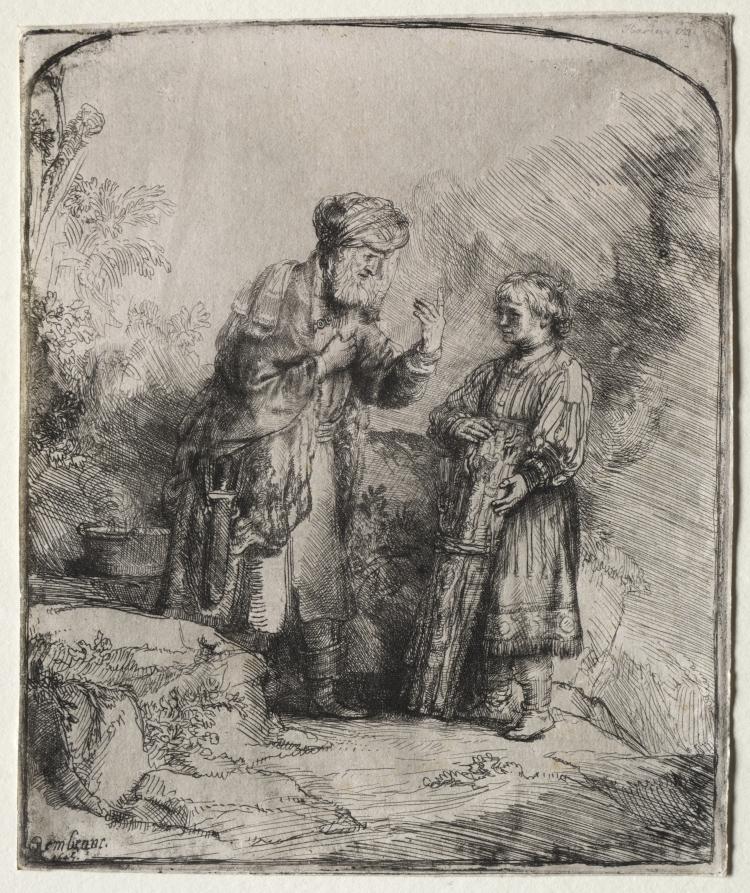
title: Abraham and Isaac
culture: Netherlands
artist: Rembrandt van Rijn (Dutch, 1606–1669)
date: 1645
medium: etching with drypoint and burin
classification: Print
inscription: lower left, in plate: Rembrant. / 1643. ; upper right, in graphite: Haring [illegible] ; VERSO, lower left, in graphite: 38 ; lower left, in graphite: 32 ; lower center, in graphite; B 34 ; lower center, in graphtie: 21 ; lower left, in graphite (erased)